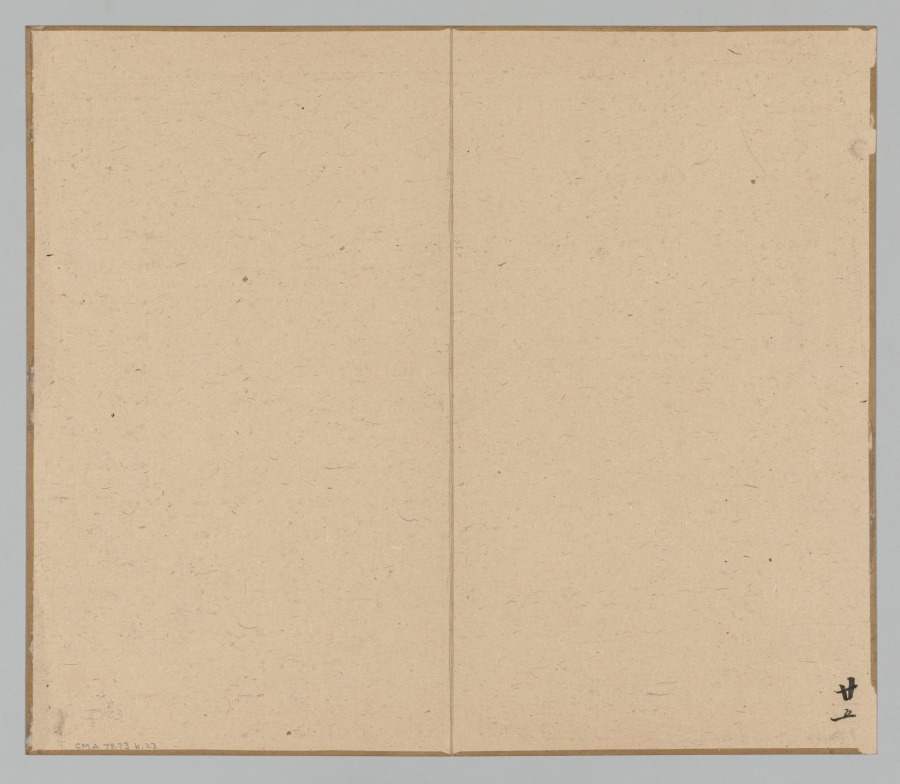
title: Reverberations of Taiga, Volume 2 (leaf 23)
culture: Japan, Edo period (1615–1868)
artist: Aoki Shukuya (Japanese, d. 1802)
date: mid- to late 1700s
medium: double-leaf from a pair of albums; ink and light color on paper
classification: Portfolio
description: Traditionally, young painters in Japan began their studies with an established master-painter. The master's compositions invariably became models that the apprentice copied to learn various ink and brush techniques. Shukuya was a pupil of the famous Kyoto artist Ikeno Taiga, whose style is reflected in these sketches of rocks, trees, and mountains.